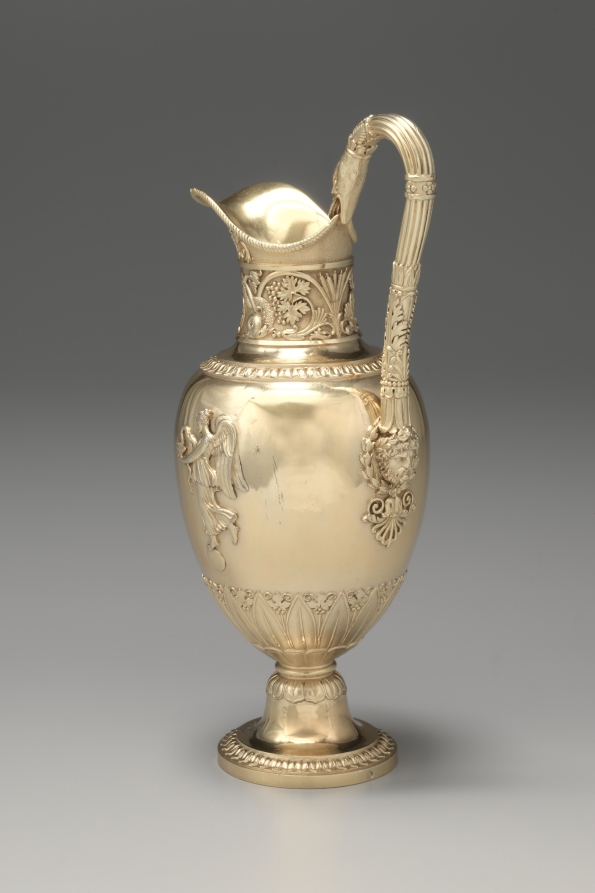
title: Ewer (aiguière)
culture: France, 19th century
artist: Jean Baptiste Claude Odiot (French)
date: c. 1817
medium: silver gilt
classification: Silver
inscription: [Excise mark for medium-sized work, Paris, 1809-1819, on edge of base]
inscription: [Two maker's marks of Jean-Baptiste-Claude Odiot after the Revolution, inside foot]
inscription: [Official assay mark for first standard silver, Paris, 1809-1819, near exterior upper rim]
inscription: [Applied coat of arms of the count Alfred de la Chapelle, Seigneur of Morton and Beaulieu, Périgord “accolé” with an alternate version of de la Chapelle, exterior of foot]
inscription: [Struck twice, interior foot]: "ODIOT"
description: Jean-Baptiste-Claude Odiot’s reputation stretched internationally. Commissioned by Russian count Nikolei Demidoff, this ewer was one part of an extensive silver dinner service. Decorated with motifs of classical antiquity, this object’s Greco-Roman silhouette, grape vine frieze, raised mythological figures, and sinuous swan’s neck handle were likely inspired by the designs of Charles Percier and Pierre-François Fontaine, architects of Napoleon I.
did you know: The coat of arms on the foot of this ewer belongs to the count Alfred de la Chapelle who owned this silver dinner service during the second half of the 19th century.